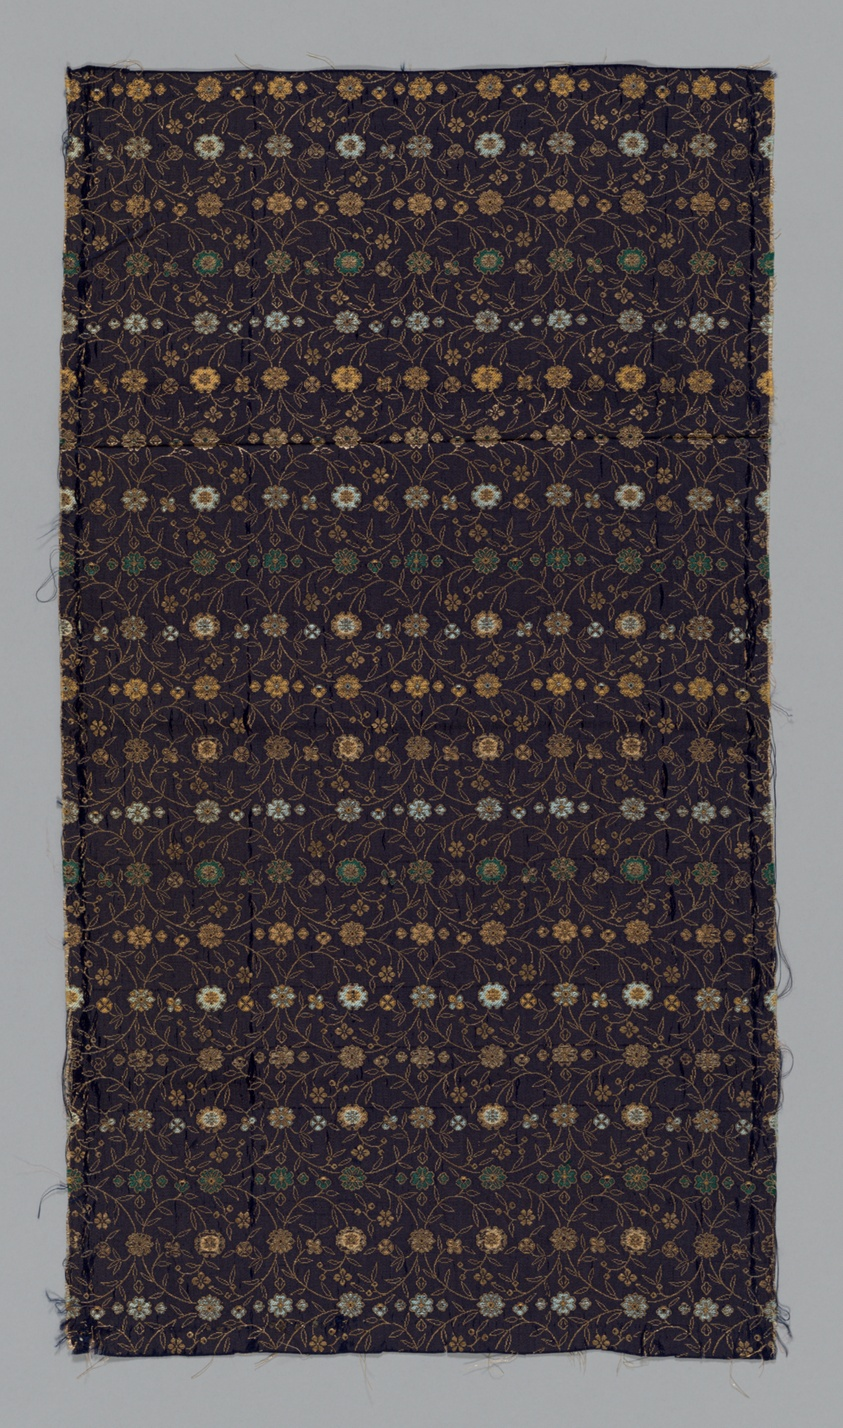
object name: Textile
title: Fragment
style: edo (japanese period)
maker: Japan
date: Edo period (1615–1868), 1775/1825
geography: Japan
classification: textile; weaving